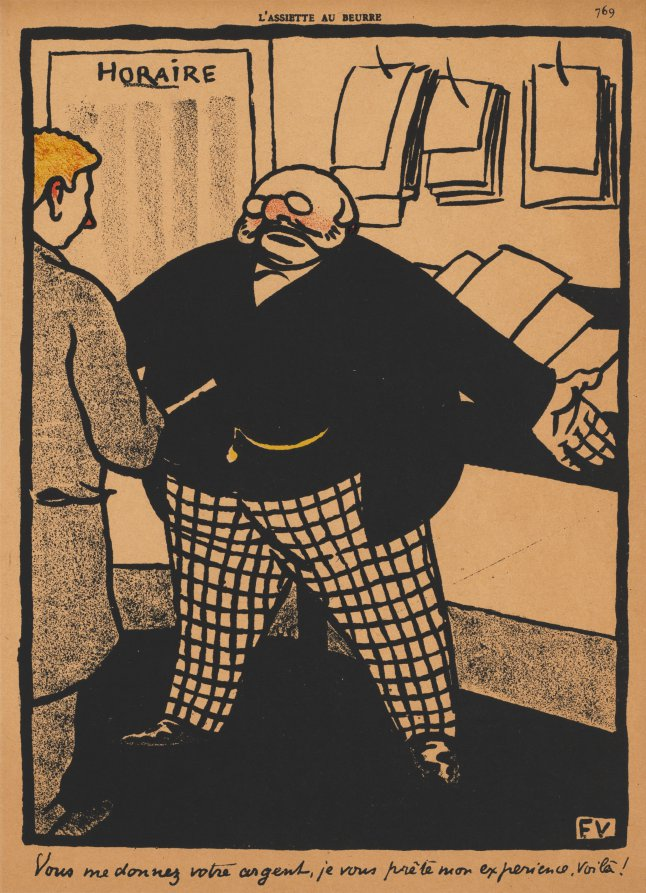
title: You give me your money...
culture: France, 19th century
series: Crimes and Punishments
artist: Félix Vallotton (Swiss French, 1865–1925)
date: 1901, published 1902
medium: color lithograph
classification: Print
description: This print was published in the magazine L’Assiette au Beurre (March 1, 1902 ) as plate 12 from the series Crimes and Punishments.